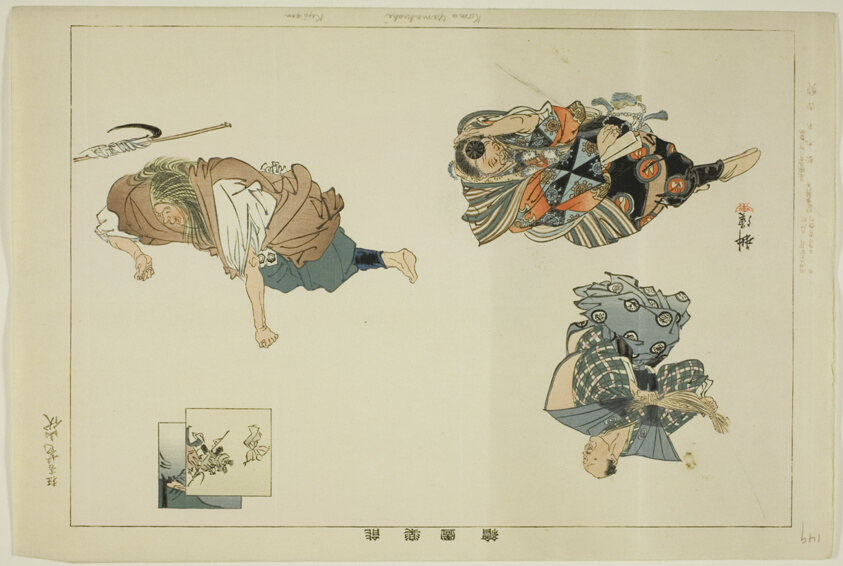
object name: Print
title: Komo Yamabushi (Kyogen), from the series "Pictures of No Performances (Nogaku Zue)"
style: Japanese (culture or style)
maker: Tsukioka Kogyo; Japanese, 1869-1927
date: 1898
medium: Color woodblock print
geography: Japan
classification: woodblock print; print; asian art